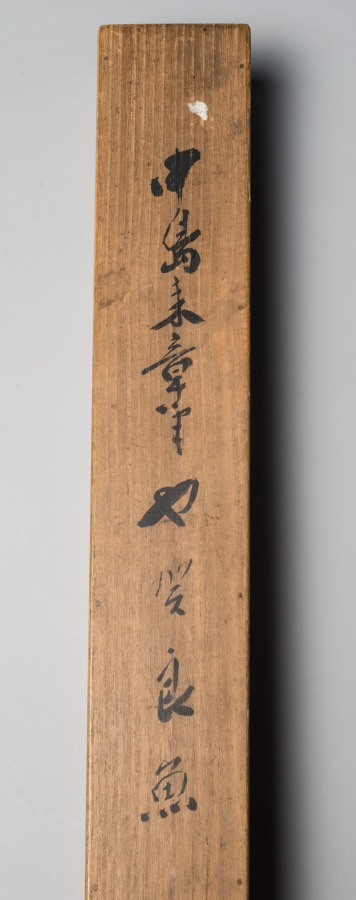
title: Needlefish (Yagara)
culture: Japan, Edo period (1615–1868)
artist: Nakajima Raishō (Japanese, 1796–1871)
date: 1870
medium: hanging scroll; ink and color on paper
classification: Painting